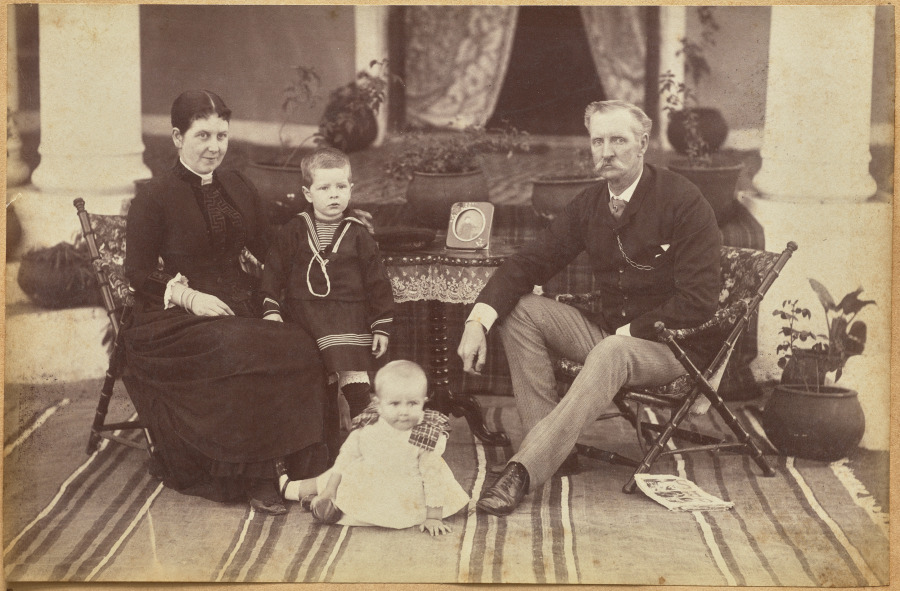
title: Col. Carpendale and family, Neemuch (recto, bottom)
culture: India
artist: Raja Deen Dayal (Indian, 1844–1905)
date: c. 1882–87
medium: albumen print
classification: Photograph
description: These photographs are part of an album, now disassembled, of around 105 photographs taken in India between 1885 and summer 1887 that provide glimpses into the lives of the British colonial elite and royal and upper-class Indians. The museum holds another group of 37 pictures from this album (2016.266), which was probably commissioned by a British civil servant visiting or working in India around 1888 as a personal souvenir of his experiences there.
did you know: Raja Deen Dayal is regarded now, and was considered during his lifetime, to be India’s most important 19th-century photographer.